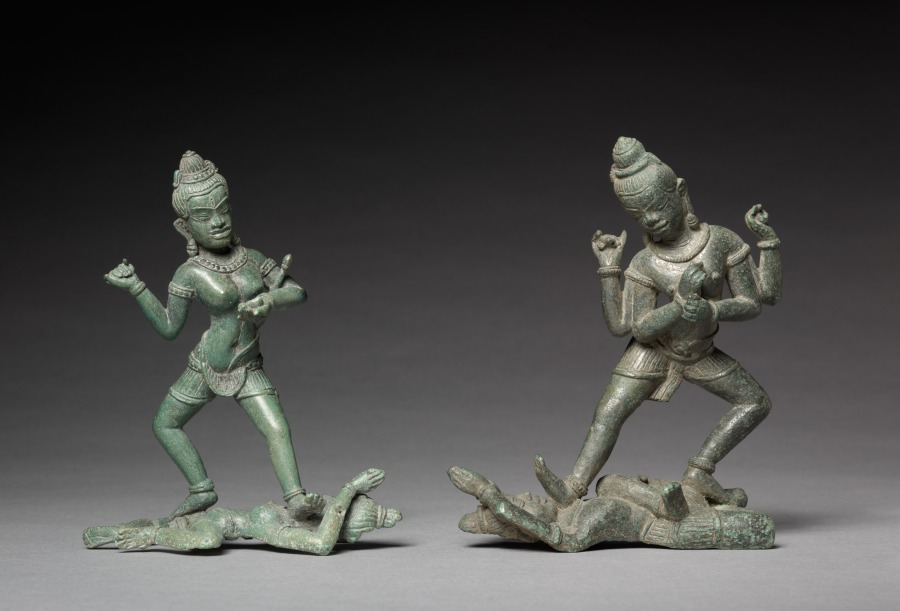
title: Shamvara and A Dakini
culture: Cambodia, Angkor, 11th century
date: c. 1100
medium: bronze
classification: Sculpture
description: Two extremely rare bronzes of tantric Buddhist deities depict the trampling of the personifications of the afflictions that keep beings cycling around the world of samsara, moving from one unhappy birth, death, and rebirth to another. The male figure, a prominent form of a tantric Buddha in Tibetan Buddhism, is four-armed and probably once held a vajra and bell in his crossed hands. The female deity appears to hold a skull cup in her left hand, with a mace in the crook of her elbow, and she grasps an unclear object that may be a flaying knife in her upraised right hand.